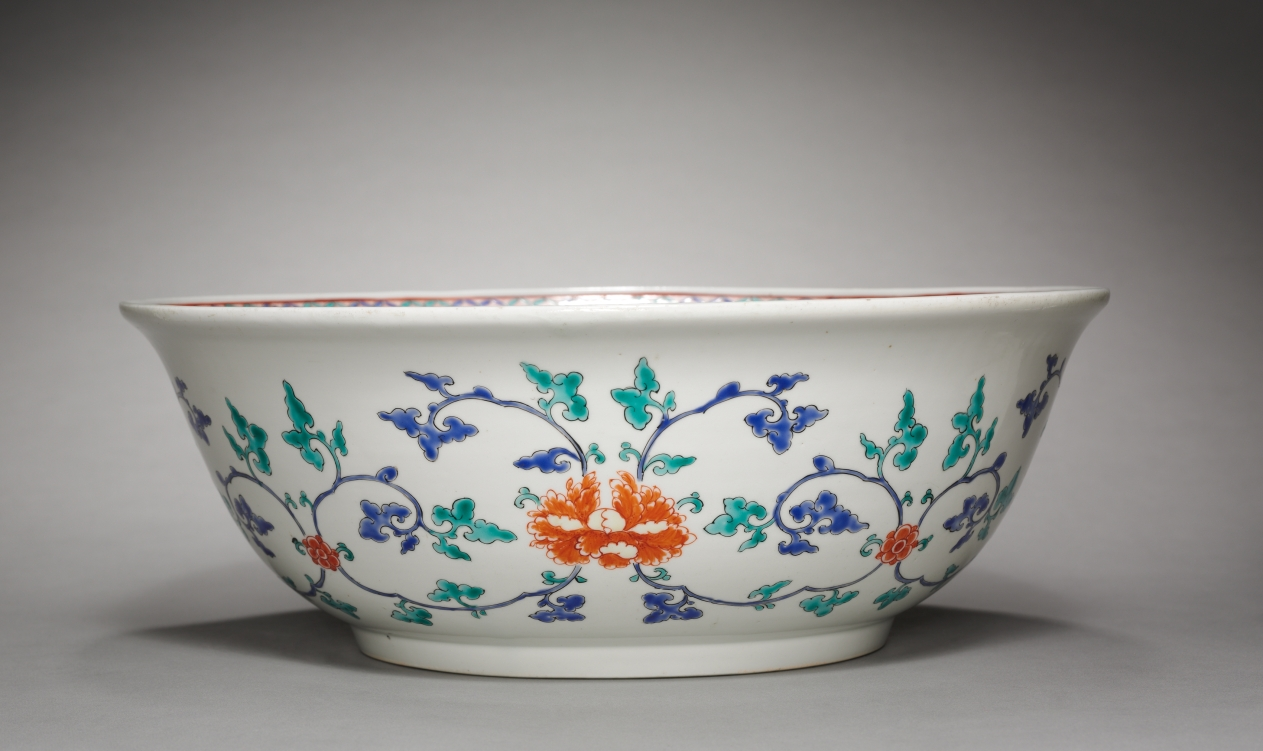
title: Bowl: Kakiemon Ware (1 of 2)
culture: Japan, Edo period (1615–1868)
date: late 1600s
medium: Imari ware porcelain with overglaze enamel and gold decoration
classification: Ceramic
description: The Chinese style of decoration identifies this bowl as a product made for the markets in England, Holland, France, and Germany. Here, kakiemon potters rearranged the Chinese literati motifs of the plum, pine, and bamboo. Such kakiemon ware inspired domestic porcelain production in Europe in the 1700s and 1800s.